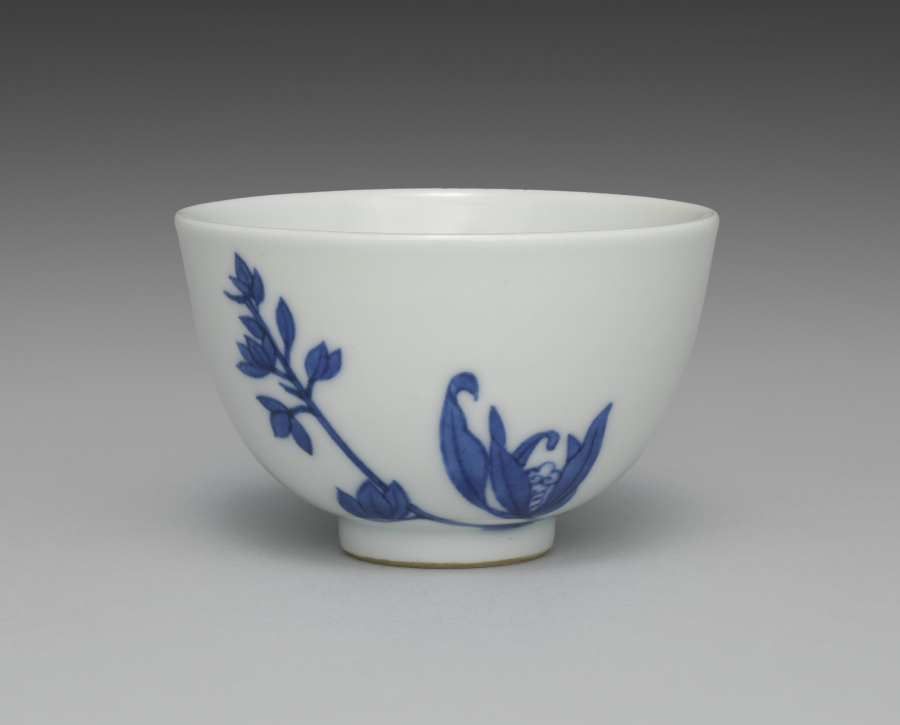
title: Teacup from Tea Set with Orchids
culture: Japan, Meiji period (1868–1912)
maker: Seifū Yohei III (Japanese, 1851–1914)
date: c. 1893–1914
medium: Porcelain with underglaze blue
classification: Ceramic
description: Although the teapot here is stored in a separate box from the five cups, these six pieces may once have been part of a tea set that included other tools such as a water cooler. The teacups have orchid flowers on both sides in underglaze blue, as well as a blue band inside the footring. The teapot has the same design and a blue band painted around the bottom of the lid’s knob. The cups’ long wood storage box is stamped on the exterior, over the lid and base, with a small red seal reading “Satō.” The same seal appears on five small squares of yellow textile, one placed in the bottom of each compartment in the teacup storage box. These are additional to the customary yellow cloths stamped with a “Seifu” seal. Interestingly, four of the Seifū cloths are stamped with an ovoid seal, while the remaining cloth, which is a slightly lighter color, has an unusual seal that is not quite gourd-shaped and with the fū of Seifū in a stylized, unrecognizable form. The teapot has its own box with a Satō seal and is wrapped with an orange textile stamped with the same unusual Seifū seal. A set with a very similar surface design is in the Brooklyn Museum. The Brooklyn set has a water cooler and a small pitcher, in addition to the teapot and cups, and all are in a single storage box. This box records the tea tools as made with kanpakuji, or “bright-jewel white porcelain,” counted among Yohei III’s most important inventions, and carved images. In fact, both sets have a white surface much closer in coloration to the cool white of porcelain clay used in Kyoto at the time, and the designs are simply painted. The Brooklyn set was thus likely mismatched at some point with a box intended for another tea set. Nonetheless, the box may have helped prevent the set’s original components from being dispersed, and the set itself provides insight into how the other tools from the present set may have looked.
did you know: This tea set with orchids has a side-handled pot called a kyūsu, used for steeping, straining, and serving tea.